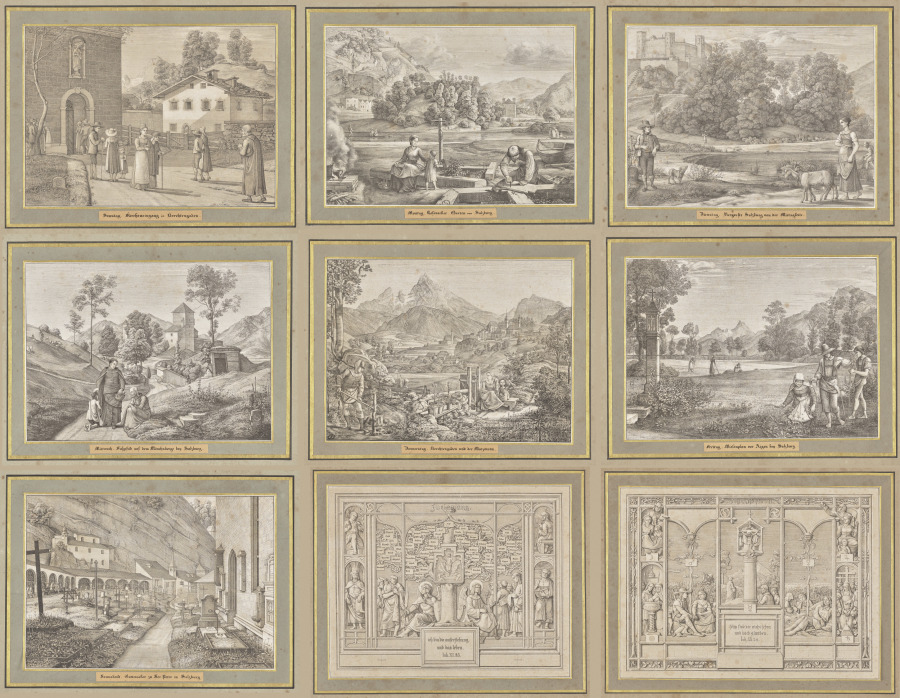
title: Seven Areas from Salzburg and Berchtesgaden. Arranged according to the seven days of the week, connected by two allegorical sheets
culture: Germany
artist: Ferdinand Olivier (German, 1785–1841)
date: 1818–23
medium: Set of nine lithographs mounted on gray-green cardboard with original slipcase cover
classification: Print